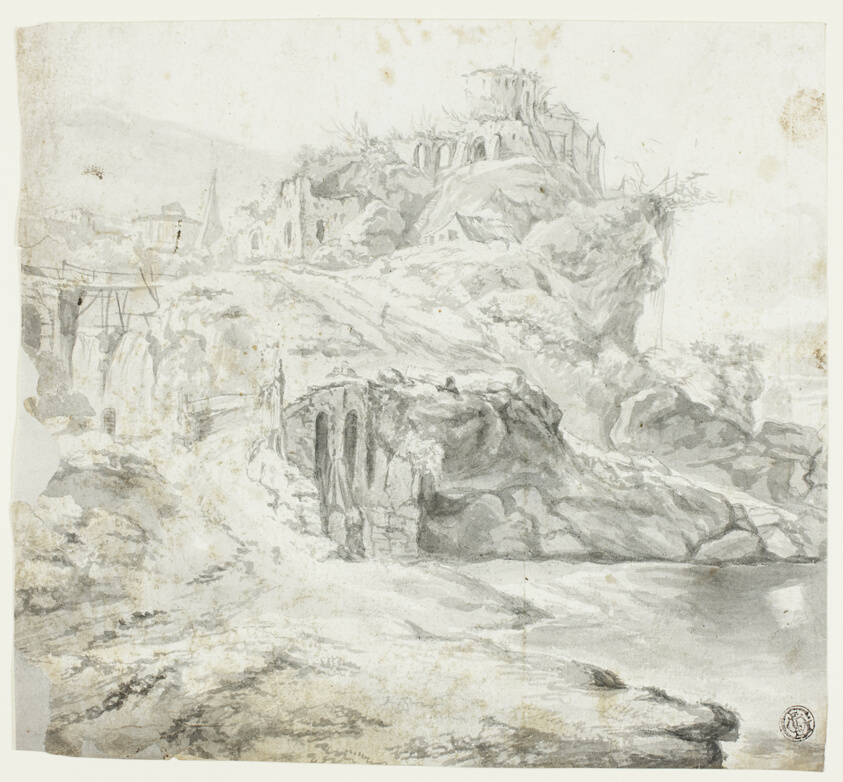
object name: Drawing and Watercolor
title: Rocky Promontory with Ruins and Cascades (recto); Sketch of Cliff with Buildings (verso)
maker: Attributed to Giles Edme Petit; French, 1694-1760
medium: Brush and gray wash over black chalk (recto) and black chalk (verso) on ivory laid paper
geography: France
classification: ink or chalk wash; drawings (visual works); prints and drawing